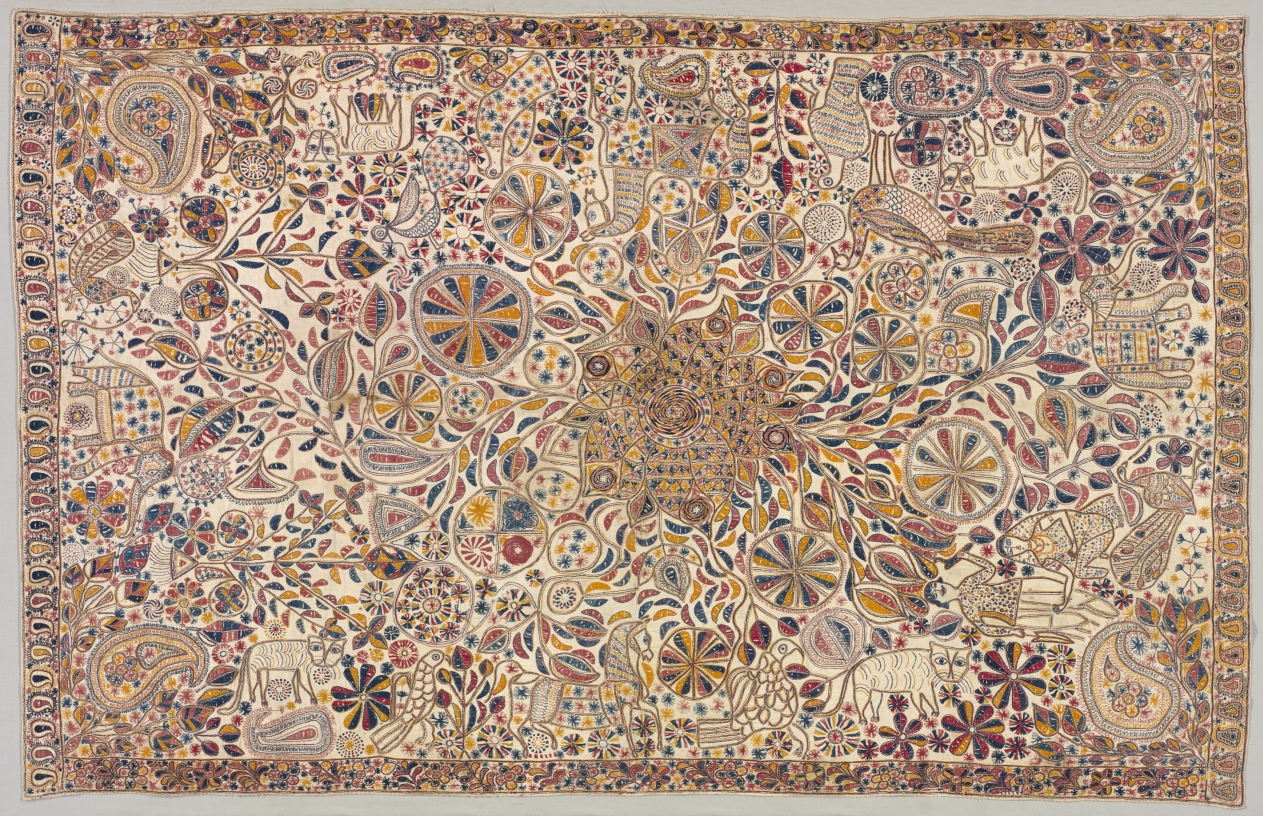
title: Kantha (Ceremonial Quilt)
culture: India, East Bengal, 19th century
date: 1800s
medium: embroidery: cotton thread on cotton tabby ground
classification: Embroidery